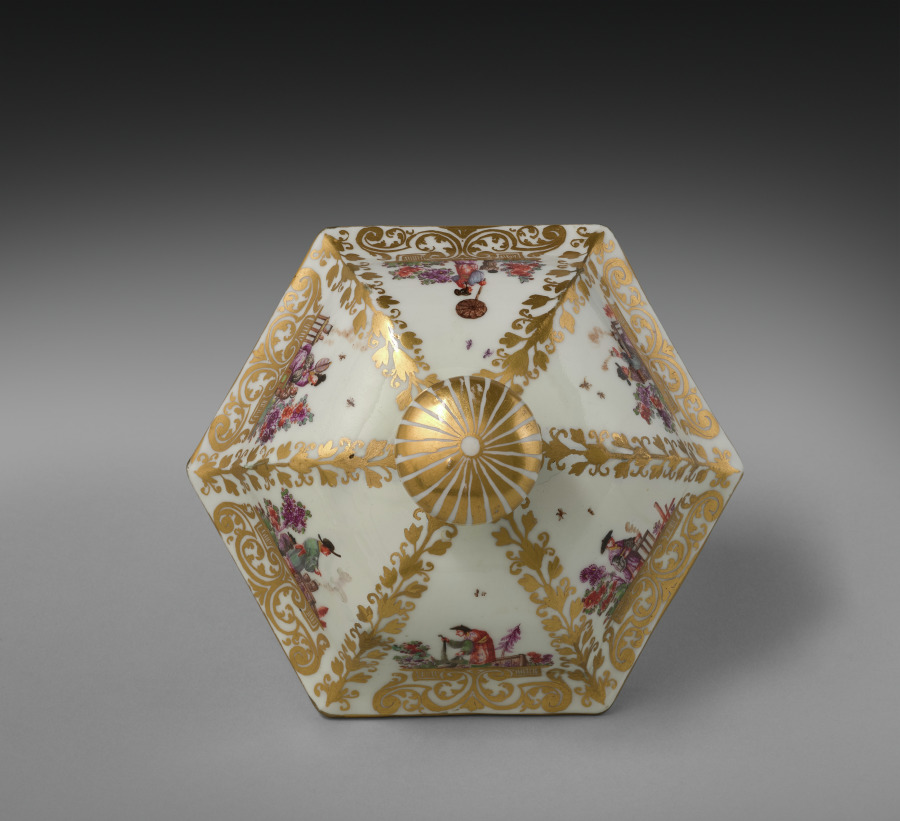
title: Cover for a Vase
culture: Germany, Meissen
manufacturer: Meissen Porcelain Factory (German, est. c. 1710)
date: c. 1728–30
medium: porcelain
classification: Ceramic